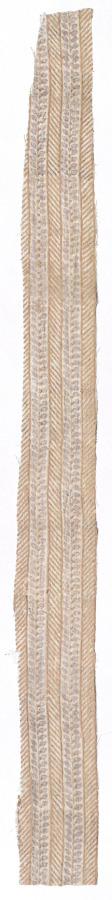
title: Fragment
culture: India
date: 1700s–1800s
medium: Block printed and overpainted with gold leaf (varak) on undyed plain weave cotton muslin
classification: Textile